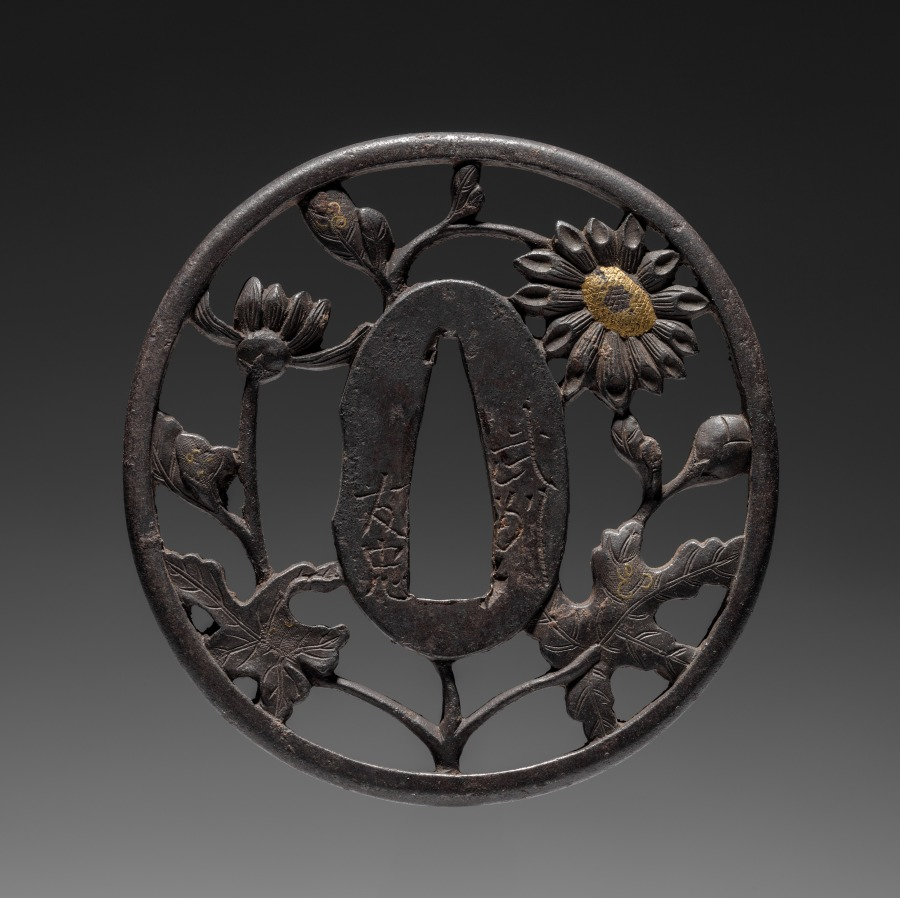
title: Sword Guard (Tsuba) with Chrysanthemum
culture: Japan, Edo period (1615–1868)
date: late 1700s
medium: iron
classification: Arms and Armor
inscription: signed: 武州友忠